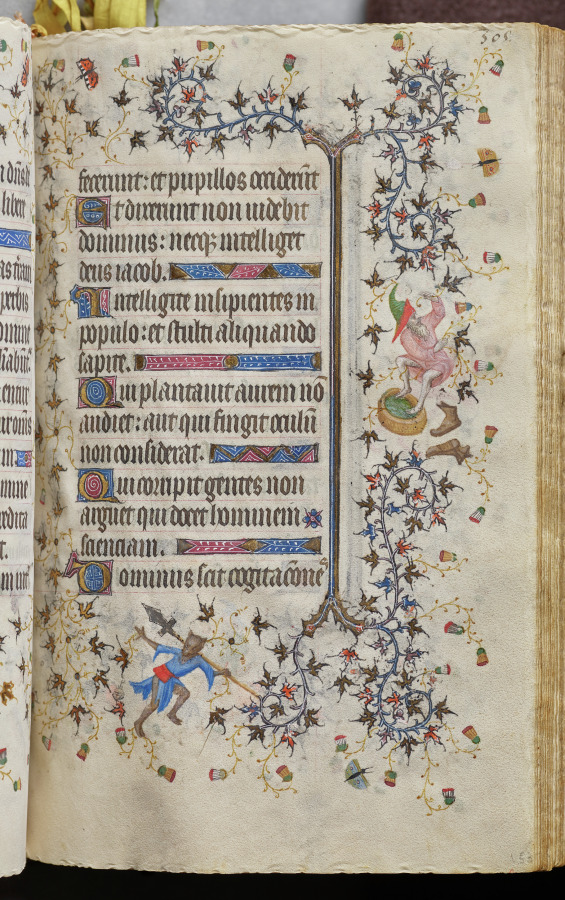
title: Hours of Charles the Noble, King of Navarre (1361-1425): fol. 153r, Text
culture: France, Paris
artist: Master of the Brussels Initials and Associates (French)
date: c. 1405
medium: ink, tempera, and gold on vellum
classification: Bound Volume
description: This precious volume was obviously highly prized by its owner, the French-born King of Navarre, who had his coat of arms painted on no less than twenty folios. Rather than directly commissioning this manuscript from a specific workshop, it seems that Charles the Noble acquired his book of hours -- perhaps ready-made for the luxury market -- while on a trip to Paris in 1404-05. A collaborative effort, six painting styles are evidenced within the pages of this codex, those of two Italians, two Frenchmen, and two Netherlanders. The painter who was responsible for the planning and decoration of the book, and who produced seventeen of the large miniatures, was a Bolognese artist known as the Master of the Brussels Initials. His principal assistant, responsible for most of the borders, was a Florentine who signed his name "Zecho" da Firenze on folio 208 verso.